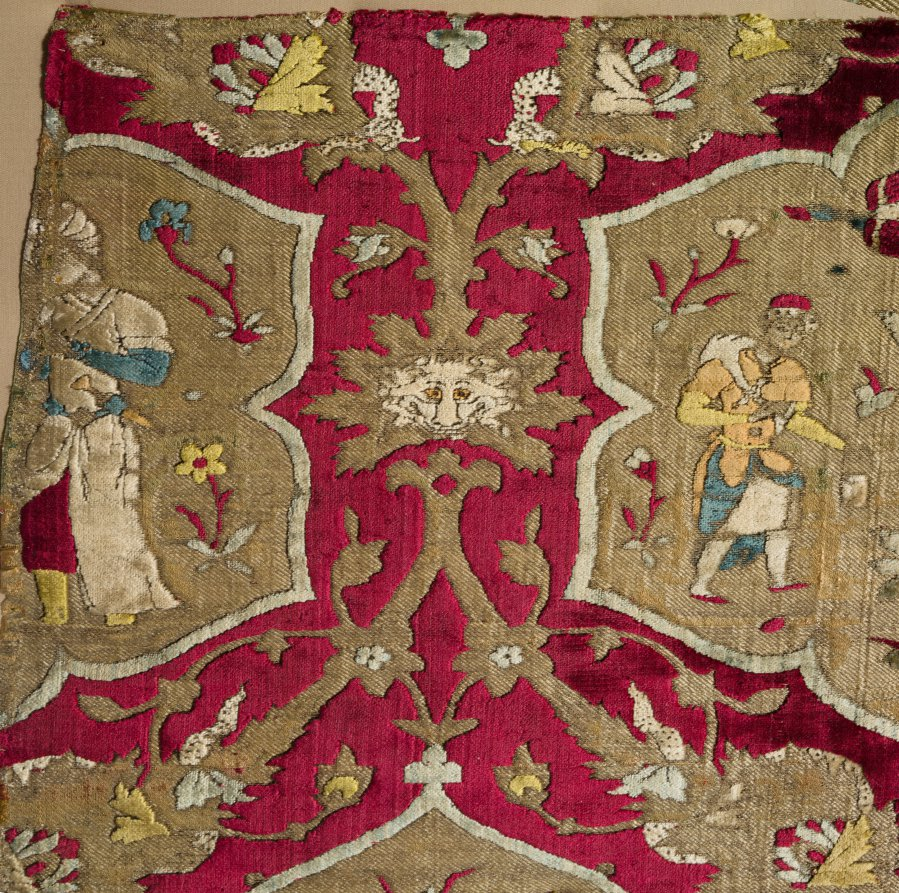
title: Fragment with falconer and attendant in animated lattice, from a robe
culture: Iran, Kashan, Safavid period (1501–1722)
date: mid-1500s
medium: Silk: velvet, brocaded, pile-warp substitution; gilt-metal thread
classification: Velvet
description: This velvet of Iran’s Safavid period (1501–1722) displaying a falconry scene is celebrated for its refined beauty and meticulous draftsmanship. A falconer and attendant flank a blossoming plant on a golden ground of lobed medallions. Animated vines display leaves bearing lion’s masks and dragons coiled around larger leaves on the crimson ground. Instead of two or three colors of velvet, Iranian weavers wove with as many as 14 colors, the most colorful velvets ever woven.